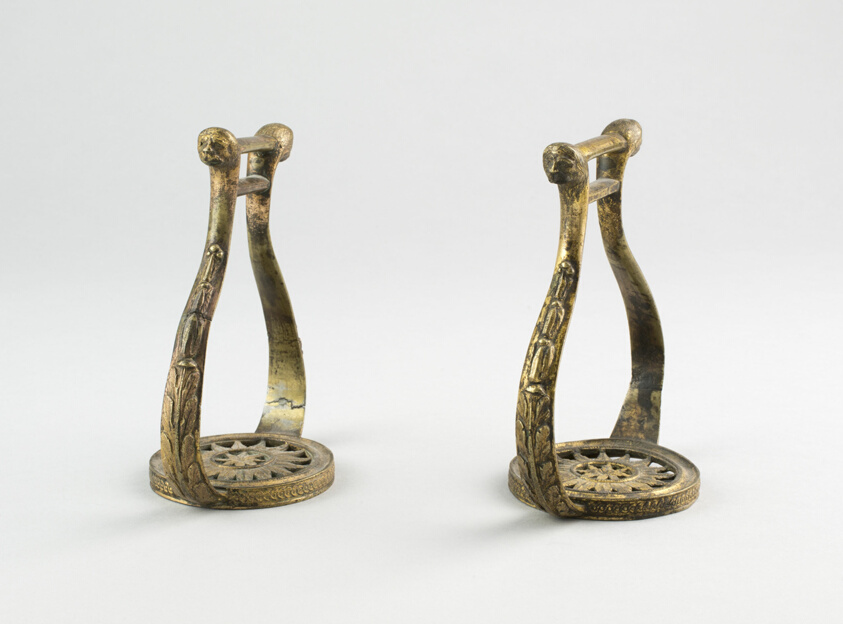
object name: Armor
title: Pair of Stirrups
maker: European, possibly French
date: c. 1800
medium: Gilded bronze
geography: France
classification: horse equipment; armor; arms and armor